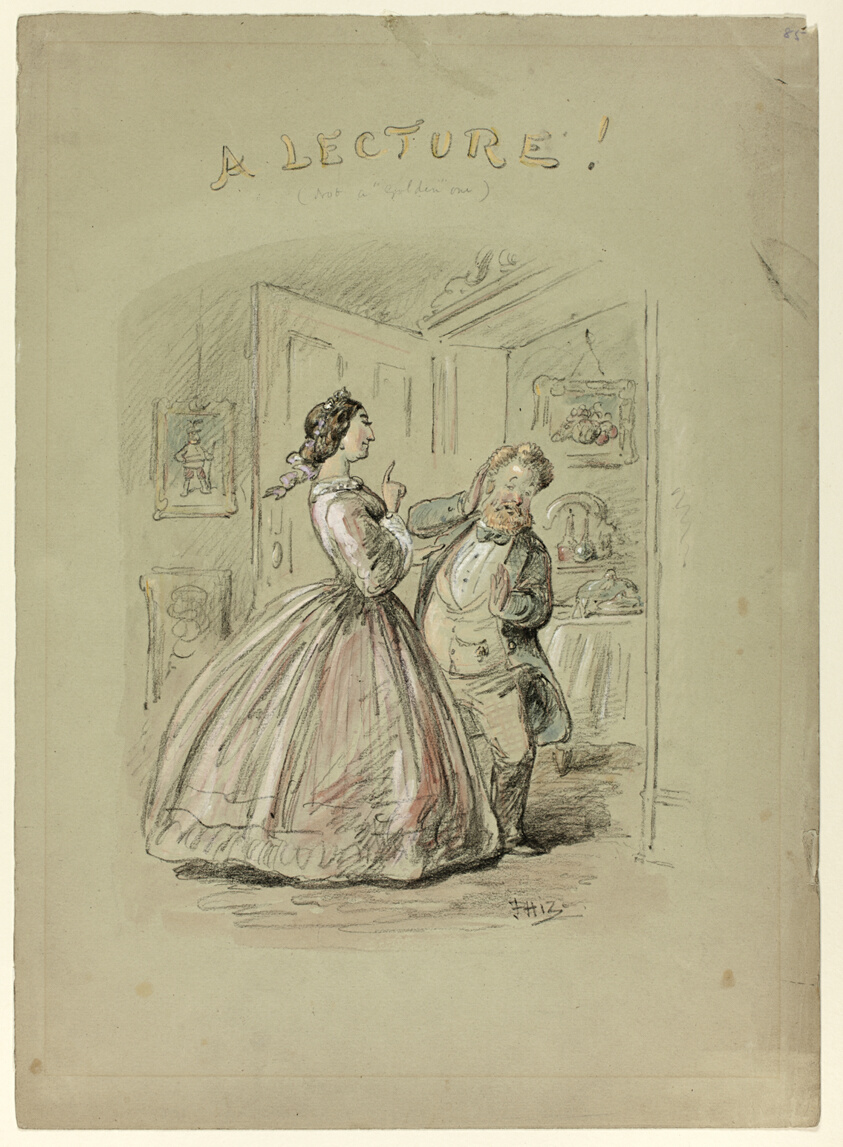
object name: Drawing and Watercolor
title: A Lecture!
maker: Hablot Knight Browne (English, 1815-1882)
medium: Black crayon, with watercolor and gouache, over touches of graphite, on grayish-green wove paper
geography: England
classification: watercolor; drawings (visual works); prints and drawing